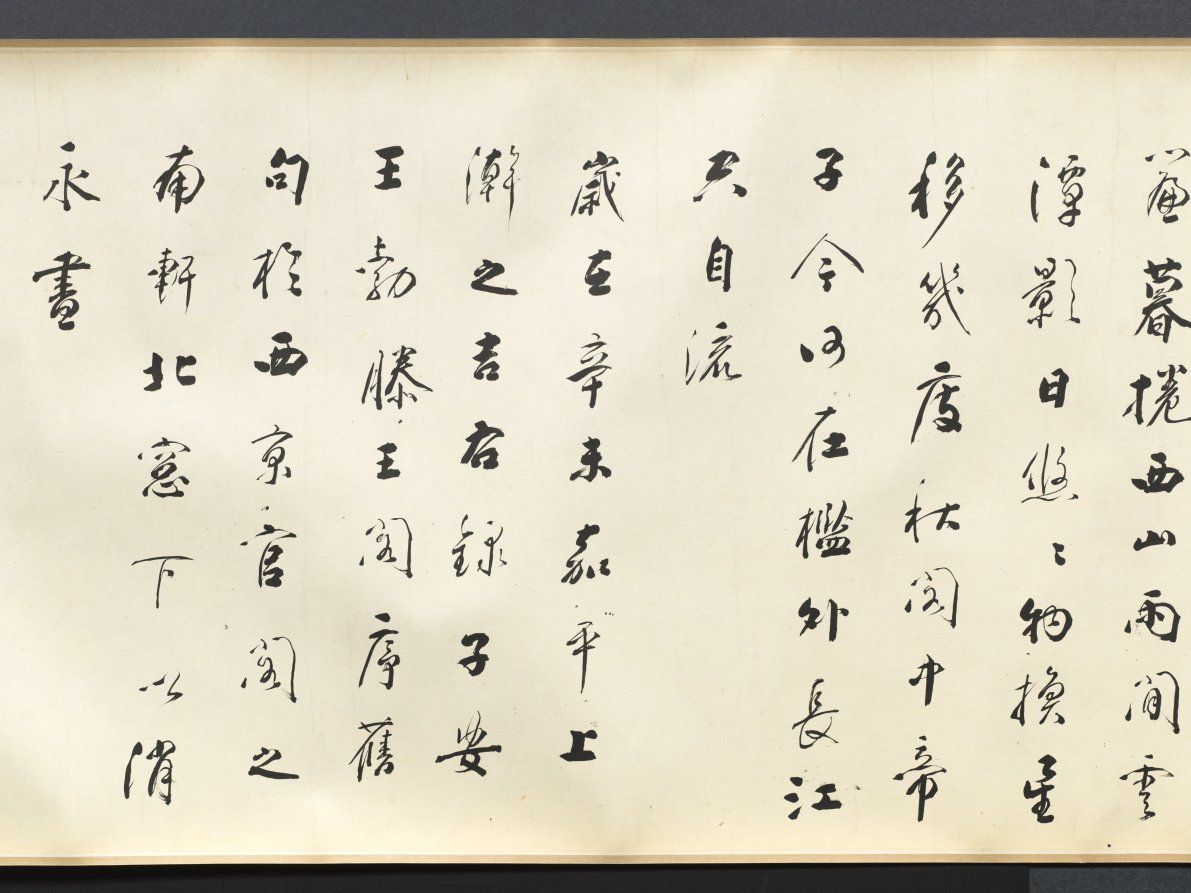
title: Calligraphy in Running Style based on Wang Bo's Essay on Tengwang Pavilion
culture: China, Changbai, Qing dynasty (1644-1911)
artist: Tiebao (Chinese, 1752–1824)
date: 1811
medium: handscroll, ink on paper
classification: Calligraphy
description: A member of the Donggo clan, Tiebao belonged to the Manchu Plain Yellow Banner army. As an official in the Qing court, he endured considerable vicissitude and his career was never smooth. Celebrated as a man of letters, he oversaw the publications of the Manchu military system as well as an anthology of poems by members of the imperial family and other Manchu dignitaries. In calligraphy, he was regarded as the equal of such eighteenth-century luminaries as Liu Yong (1720-1805) and Weng Fanggang (1733-1818). This handscroll is a work of his mature years and is exemplary of his disciplined and highly subtle approach to the art of calligraphy.